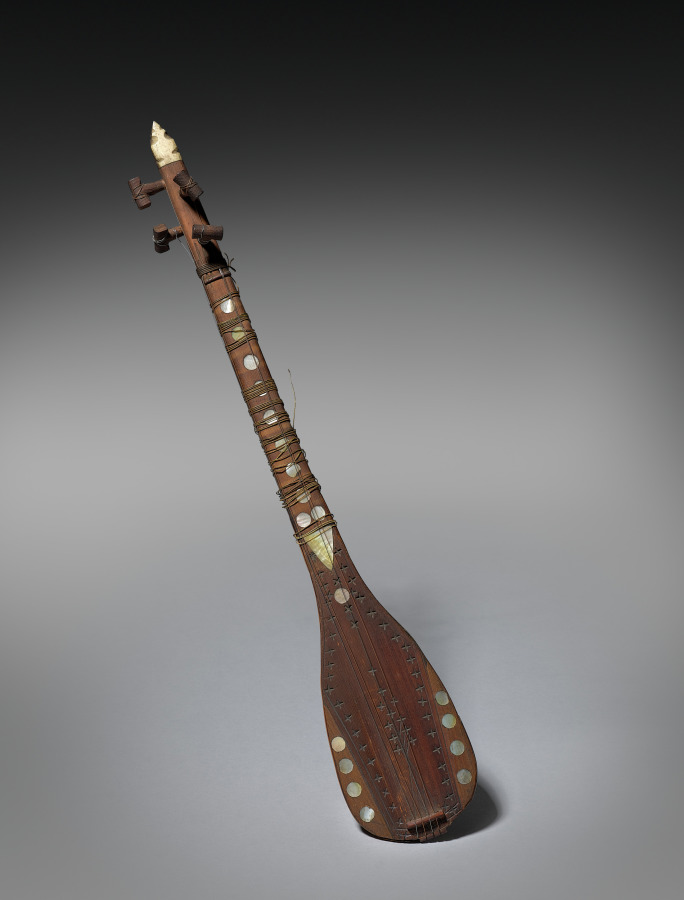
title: Tanbūr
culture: Syria or Turkey, Ottoman period (1299–1922)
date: late 1800s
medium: Wood, bone, mother-of-pearl, and wire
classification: Musical Instrument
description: This long-necked lute collected in Ottoman Syria possesses traits that are Syrian, Turkish, and Iranian and provides an example of the musical interaction between cultures. It is an ancient instrument and resembles lutes used in Pharaonic Egypt and Mesopotamia. In its many forms, the tanbūr was a common instrument throughout the Islamic world. It is often used as a solo instrument in both sacred and secular contexts. Burn marks decorate the pear-shaped body along with inlaid dots of mother-of-pearl, which may also have helped with navigation of the fret board by the player.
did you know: The two pairs of wire strings would be played with a quill plectrum.